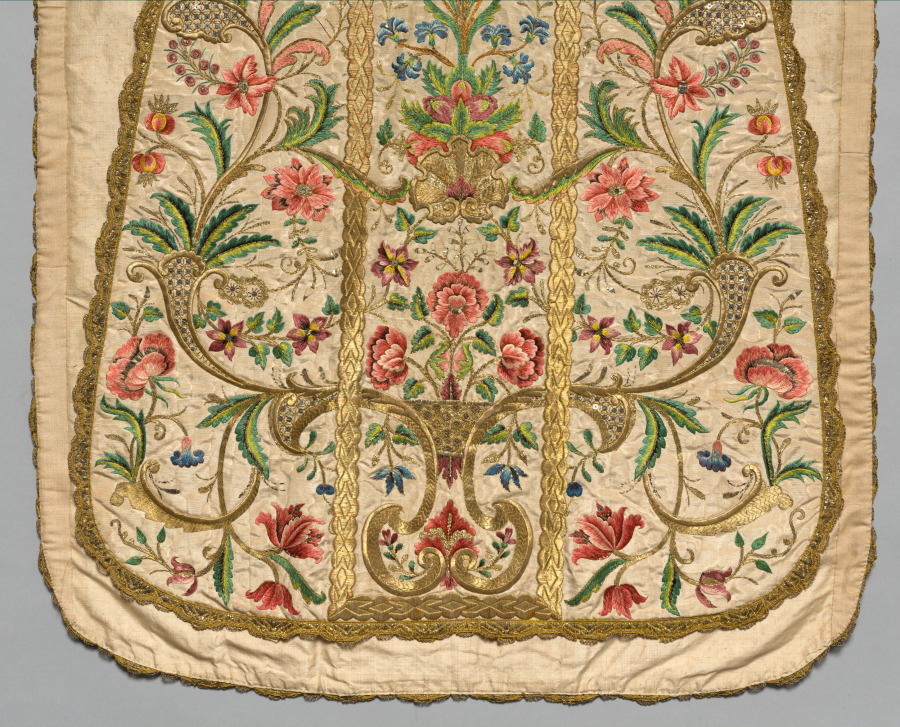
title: Chasuble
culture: Italy, 18th century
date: 1700s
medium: Silk and metallic threads; embroidery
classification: Textile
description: A beautiful design emanates from a vase in the center of this chasuble, displaying symmetrical flora that extend across embroidered gold braids into graceful curvilinear cartouches, reflecting contemporary architectural decoration. Also in the center, sheaves of wheat and grapes represent the bread and wine of the Mass. Gold sequins within thread-outlined squares illustrate fine quality workmanship. The decoration of the stole and chalice veil is similar to the chasuble, also on moiré (watered) silk fabric. The stole, an insignia of the office of deacons and priests, is worn under a chasuble, and the chalice veil—bearing the monogram of Jesus Christ, ihs, in the center—covers the chalice and paten (the plate holding the Eucharistic bread).